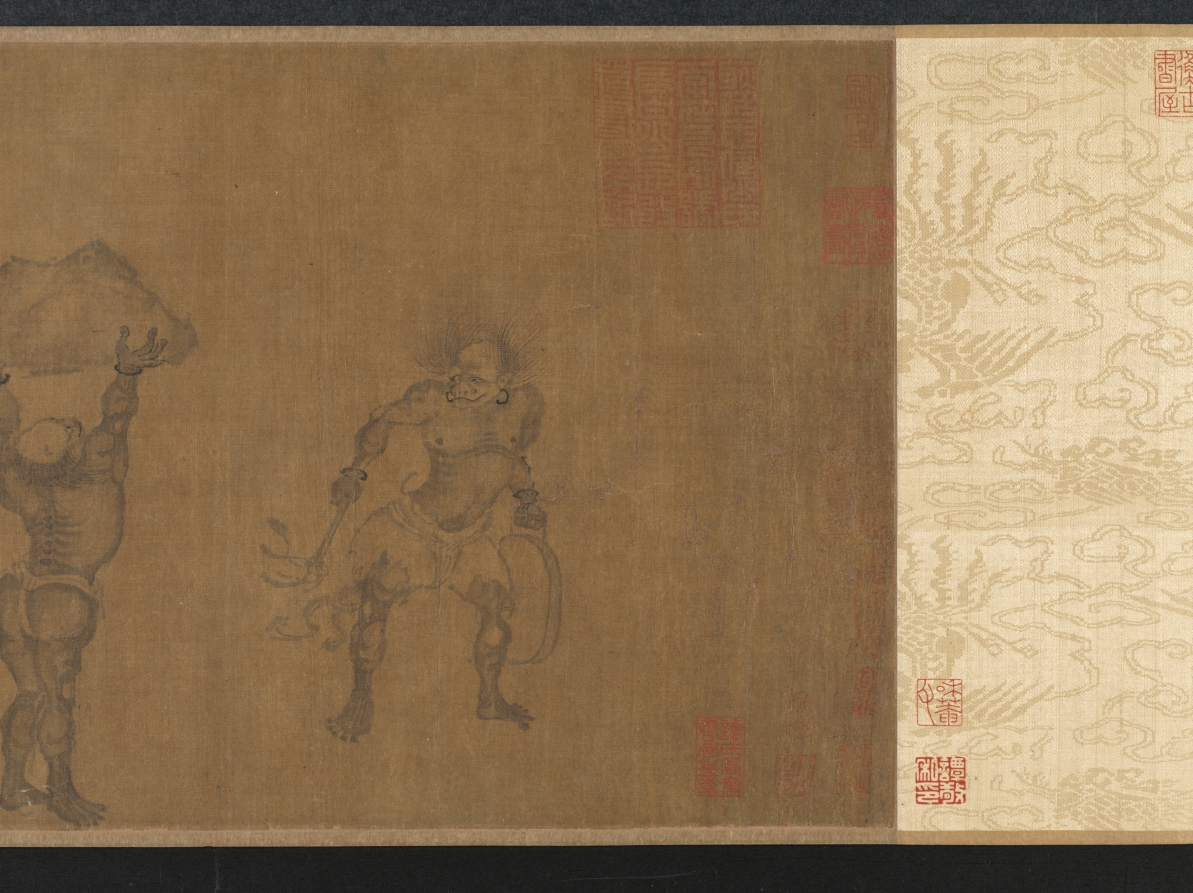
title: The Lantern Night Excursion of Zhong Kui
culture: China, Yuan dynasty (1271-1368)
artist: Yan Hui (Chinese, active 1270–1310)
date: late 1200s–early 1300s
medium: handscroll; ink and slight color on silk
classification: Painting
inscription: Artist's signature [and probable seal]: Yan Qiuyue 顏秋月 Title on frontispiece and 1 seal of Niu Shuyu 鈕樹玉 (1760–1827): Qiuyue mohuan 秋月墨幻 [Qiuyue's Ink Fantasy]. 31 additional seals: 2 of Yang Shiqi 楊士奇 (1365–1444); 2 of An Guo 安國 (1481–1534); 8 of Xiang Yuanbian 項元汴 (1525–1590); 2 of Geng Zhaozhong 耿昭忠 (1640–1686); 4 of Pu Tung 溥侗 (1870–1952); 7 of Tan Jing 譚敬 (1911–1991); 1 of Liu Ting-chih (20th c.); 5 unidentified.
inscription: An inscription by Zizhi Shanren 紫芝山人 [probably Jiang Hui 蔣惠], dated 1389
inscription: An inscription by Wu Kuan 吳寬 (1436–1504)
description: Here, the demon queller Zhong Kui leads a nightly procession of street entertainers with bare, muscular bodies and demonic faces. Some wear shabby clothes, and all perform stunts and tricks to astound and scare the viewer. In fact, a New Year custom in cities of southeast China had the poor, disguised as demons, process through the streets and play their tricks to clear households of evil spirits and welcome the spring. From right to left, a demonic figure leads the procession and beats a drum; another lifts a large rock; one stands on his hands trying to drink; one balances a jar on his elbow; three hold and wield weapons; one carries a folded chair covered by a cow’s skin; another holds Zhong Kui’s qin (zither), books, brush, and inkstone. At the end of the scroll, two figures offer a cup and bottle of wine to Zhong Kui, who lifts his hand in command.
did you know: Zhong Kui was an ancient ghostbuster.